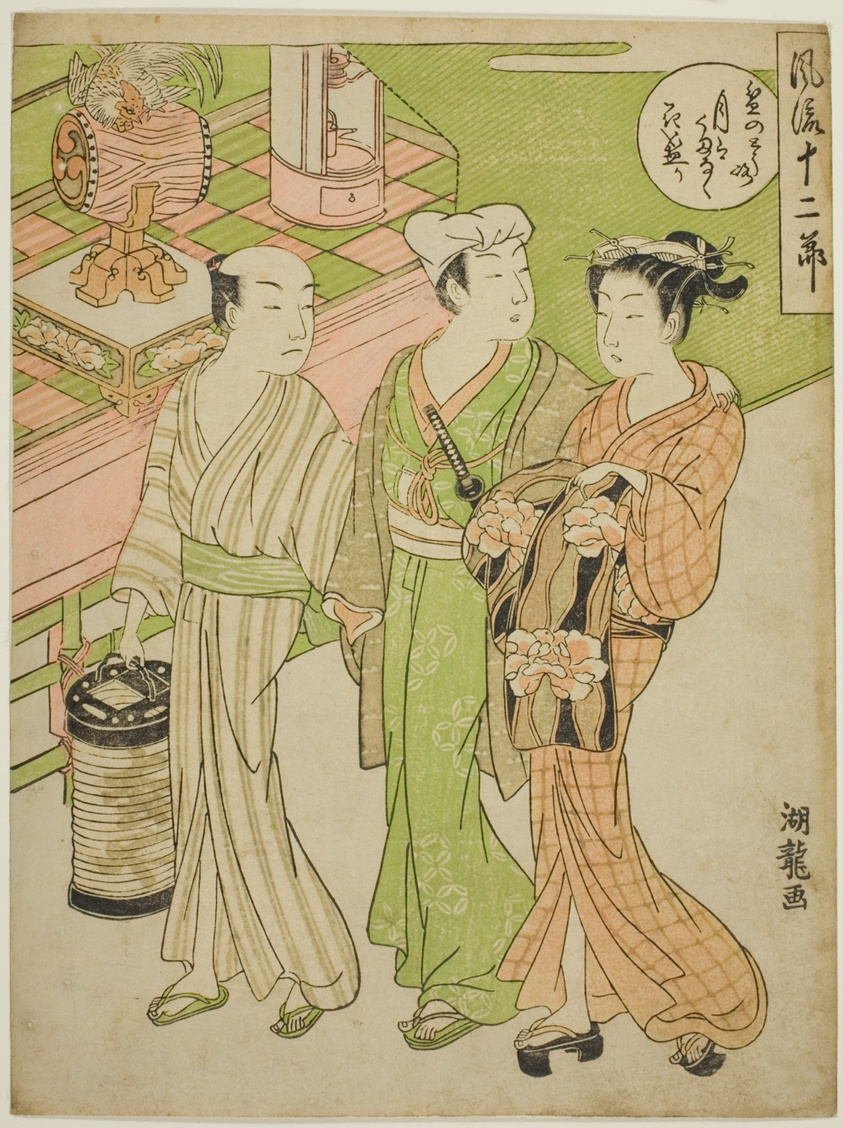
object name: Print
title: The Bon Festival in the Sixth Month, from the series "Fashionable Twelve Months (Furyu juni setsu)"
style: Japanese (culture or style)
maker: Isoda Koryusai (Japanese, 1735-1790)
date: c. 1770/72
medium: Color woodblock print; chuban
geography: Japan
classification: woodblock print; print; asian art